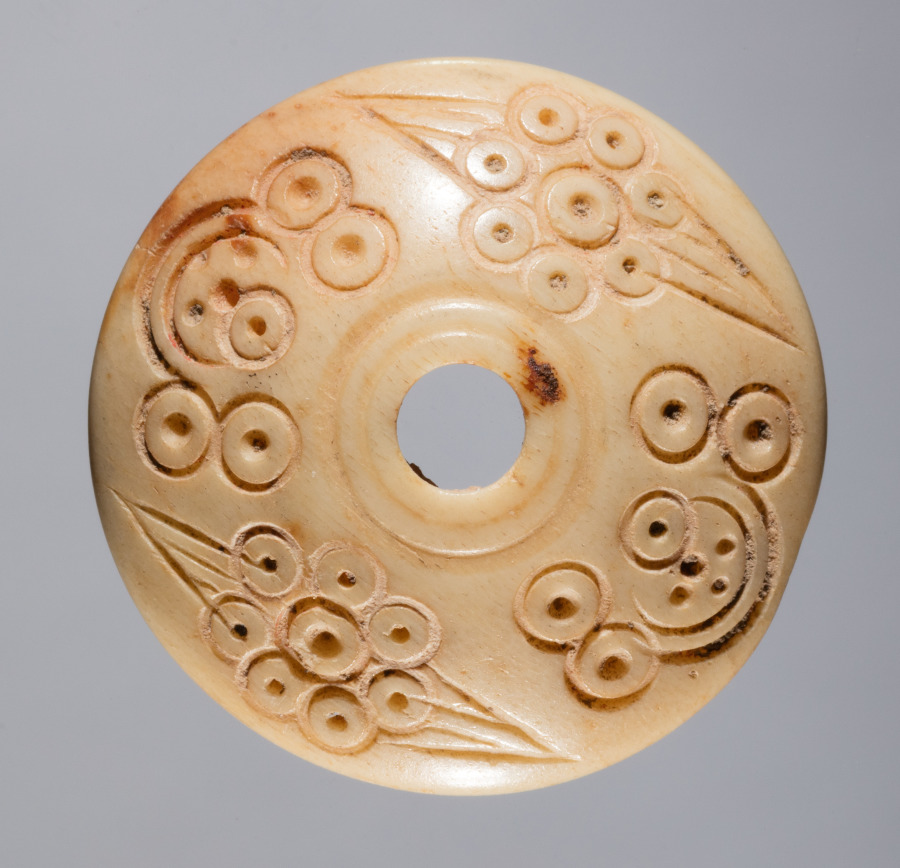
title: Spindle Whorl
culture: Iran, early Islamic period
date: 700s - 900s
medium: bone, incised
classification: Spindle Whorl